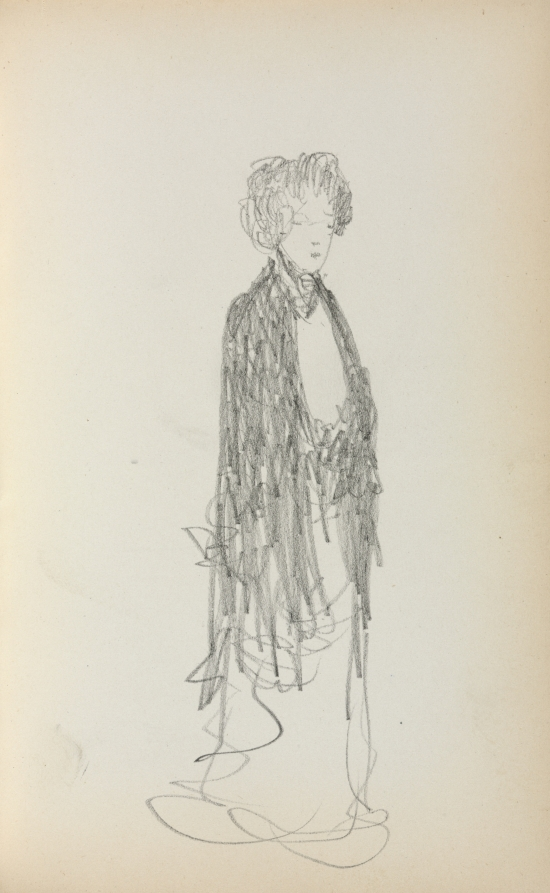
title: Italian Sketchbook: Standing Woman (page 213)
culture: America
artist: Maurice Prendergast (American, born Newfoundland [now Canada], 1858–1924)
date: 1898–1899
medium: pencil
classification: Bound Volume